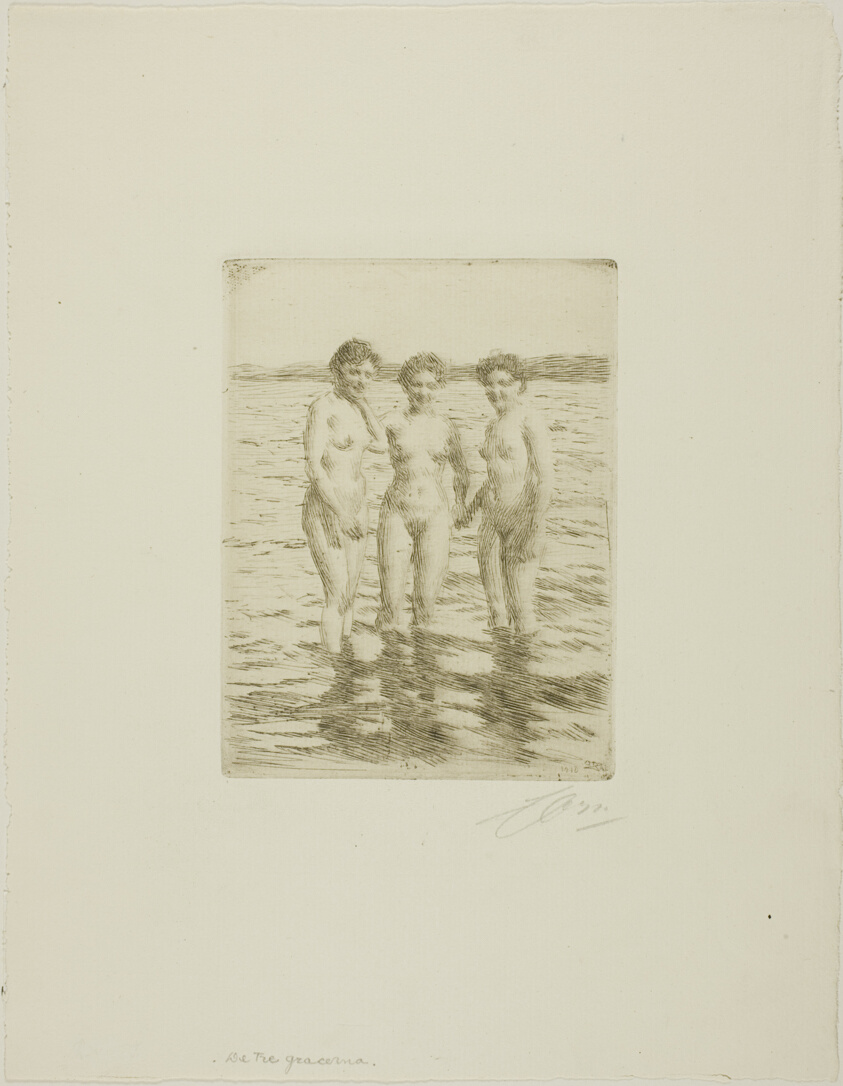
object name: Print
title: The Three Graces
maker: Anders Zorn (Swedish, 1860-1920)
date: 1910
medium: Etching on ivory laid paper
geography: Sweden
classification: etching; print; prints and drawing